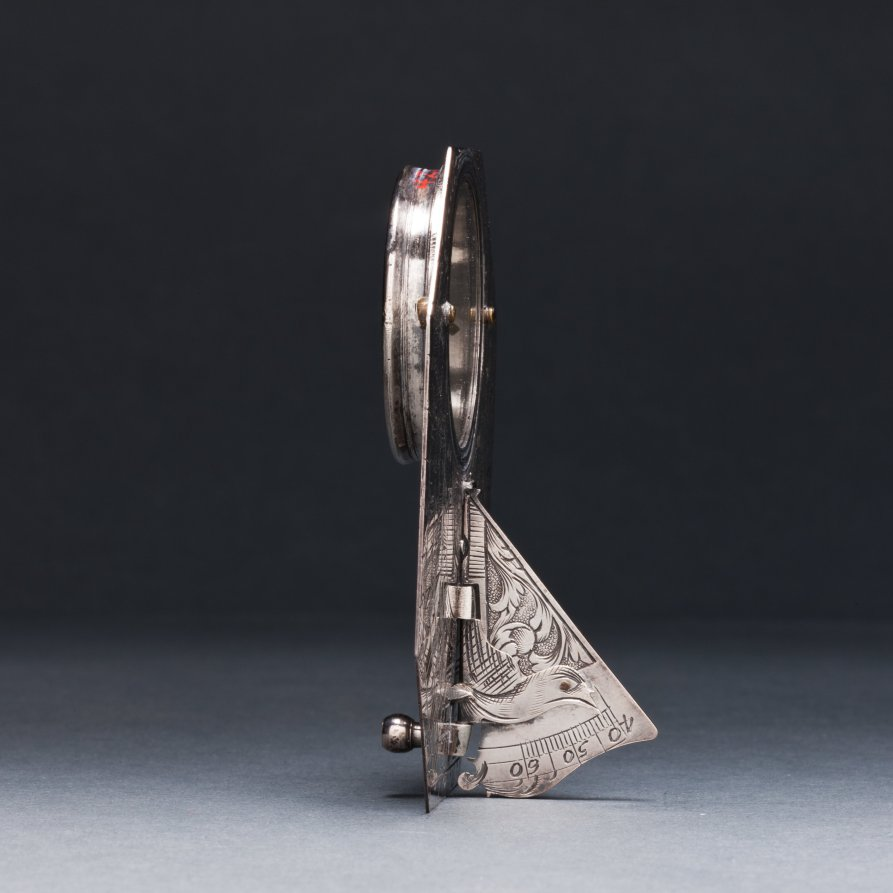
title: Butterfield Sundial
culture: France, 18th century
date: 1700s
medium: silver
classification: Silver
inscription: [Engraved signature above the compass in ribbon band]: "N. BION A Paris"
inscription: [Engraved on the face of the sundial]: “Pour 55° 4-5-6-7-8-9-10-11 50° IIII-V-VI-VII-VIII-IX-X-XI 45° 5-6-7-8-9-10-11 40° -VI-VII-VIII-IX-X-XI'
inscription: [Engraved on the other side]: "Pour 55° -8-7-6-5-4-3-2-1-0 50°-VIII-VII-VI-V-IIII-III-II-I 45°-8-7-6-5-4-3-2-1 40°-VII-VI-V-IIII-III-II-I"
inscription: [Engraved around the compass]: “NORD-OUEST-SUD-EST”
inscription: [Engraved on the back of the sundial]: “Turin 44 Milan 46 Paris 49 Lion 46 Metz 49 Rome 42 Liege 51 Naples 44 Namur 50 Gennes 44 Marseille 43 Grenoble 45 Bayonne 43 Bruxelle 51 Londres 52 Nantes 47 Vienne 48 Toulon 43 Tours 47 Lille 51”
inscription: [Engraved around the back of the compass]: “Venise 45 Strasbourg 49 Amsterdam 52 Hambourg 54 Varsovie 52 La Rochelle 46”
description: Butterfield-type sundials are characterized by their adjustable gnomons, metal flaps that cast a shadow on the dial’s face to indicate the hour, and geographical indices. This sundial has a scale adjustable between latitudes of 40° to 60° north. The latitudes of 26 European towns are engraved on its back for quick reference. With an intricately engraved silver face, it would have functioned as a fashionable traveler’s accessory.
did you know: Butterfield-style sundials were named after Micheal Butterfield, an English scientific and mathematical instrument maker who worked in Paris between 1674 and 1724.